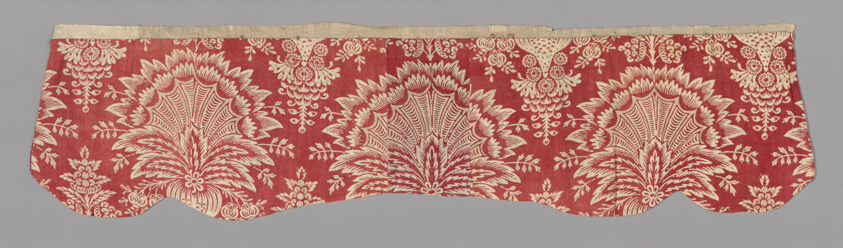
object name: Textile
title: Panel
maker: France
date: c. 1830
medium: Cotton, plain weave; block printed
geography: France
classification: textile; weaving - printed; printed textile